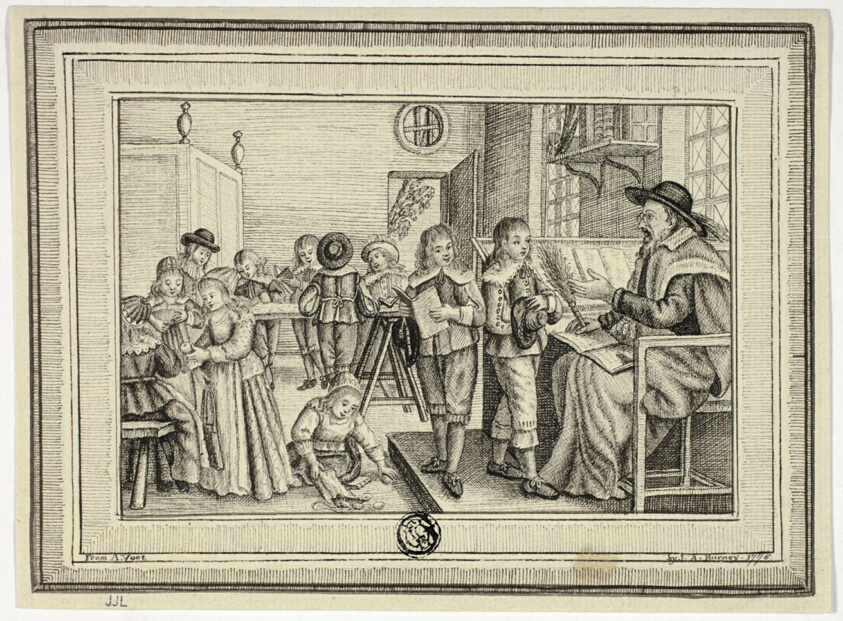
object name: Drawing and Watercolor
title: Schoolmaster with Children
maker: After Alexander Voet; Flemish, 1613-1690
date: 1633/90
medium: Pen and black ink, on ivory laid paper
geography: Flanders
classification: pen and ink drawings; drawings (visual works); prints and drawing